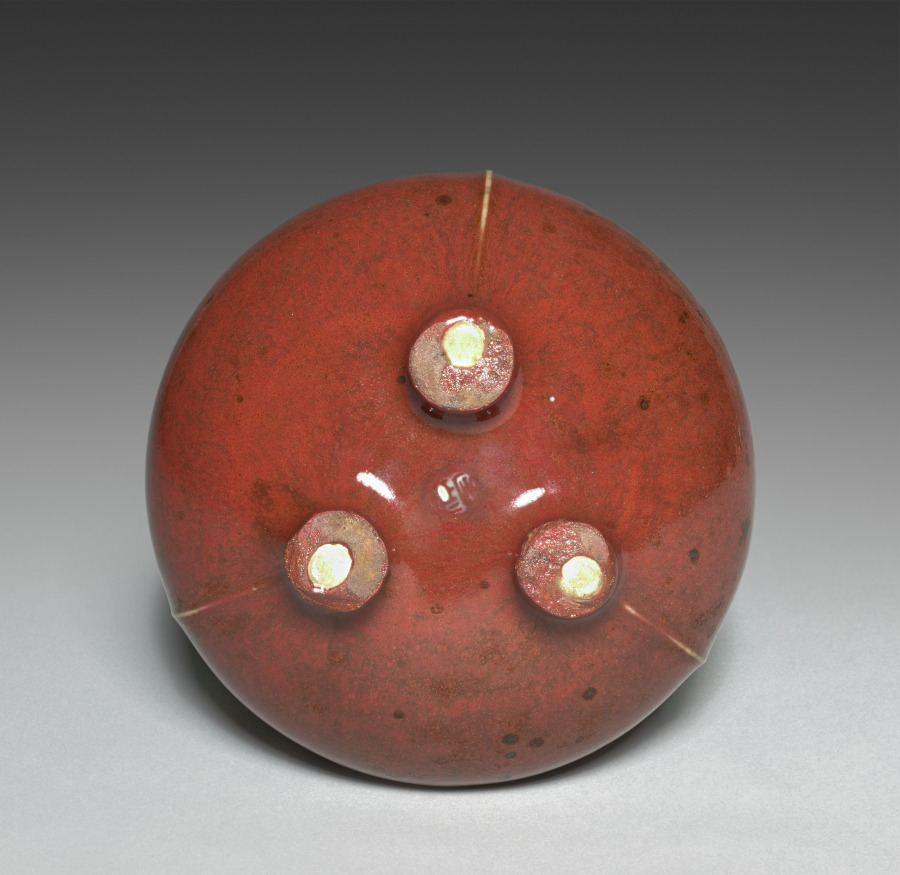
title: Incense Burner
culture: Japan, Meiji period (1868–1912)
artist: Seifū Yohei III (Japanese, 1851–1914)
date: 1893–97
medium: Porcelain with molded design, crimson glaze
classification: Ceramic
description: Seifū Yohei III made incense burners in a wide variety of designs and styles. The glaze is described as “crimson glaze” (kōyū); it is also dappled with dark spots of varied opacity and tiny pores throughout, which gives the container a rich, textured effect. Yohei III had the silver lids produced outside the studio by metalwork specialists. For this tripod, they decorated the lid with a variety of flowers.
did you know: This tripod incense burner has linear molded decorations that run around the base of the collar and down the legs.